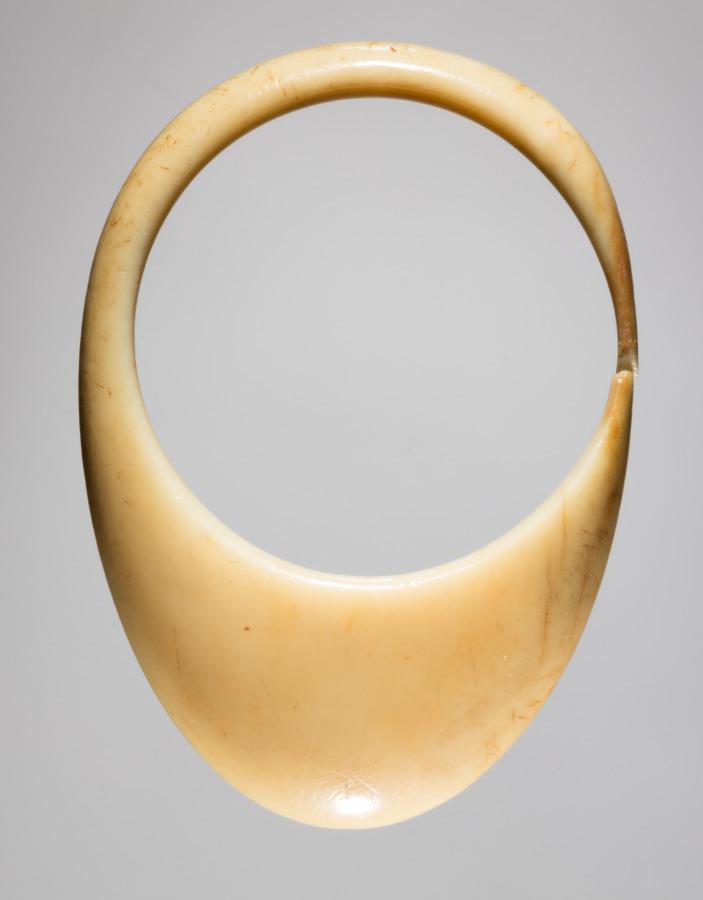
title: Ring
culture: Iran, early Islamic period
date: 700s - 900s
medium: bone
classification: Miscellaneous